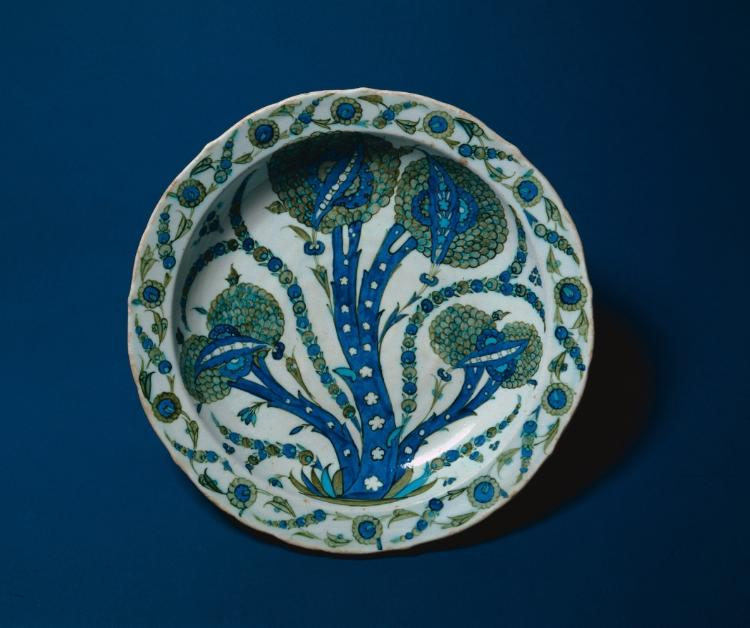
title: Large Dish with Artichokes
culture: Turkey, Iznik, Ottoman period (1299–1922)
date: c. 1535–40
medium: fritware with underglaze-painted design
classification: Ceramic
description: Ceramic vessels and tiles produced in Iznik, Turkey, for the Ottoman court in Istanbul represented the finest Islamic ceramics. Floral and vegetal motifs are a hallmark of Iznik pottery. The center of this dish is covered in a dynamic artichoke motif interwoven with rosettes and serrated saz leaves. The artichoke design was likely inspired by luxury Italian textiles imported into the Ottoman court. The dish represents a high point of Ottoman art during the reign of Sultan Suleyman the Magnificent (1520–66) in which European, Persian, Chinese, and Egyptian influences contributed to a distinct artistic language.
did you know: The artichoke is actually the bud of a thistle—a flower.